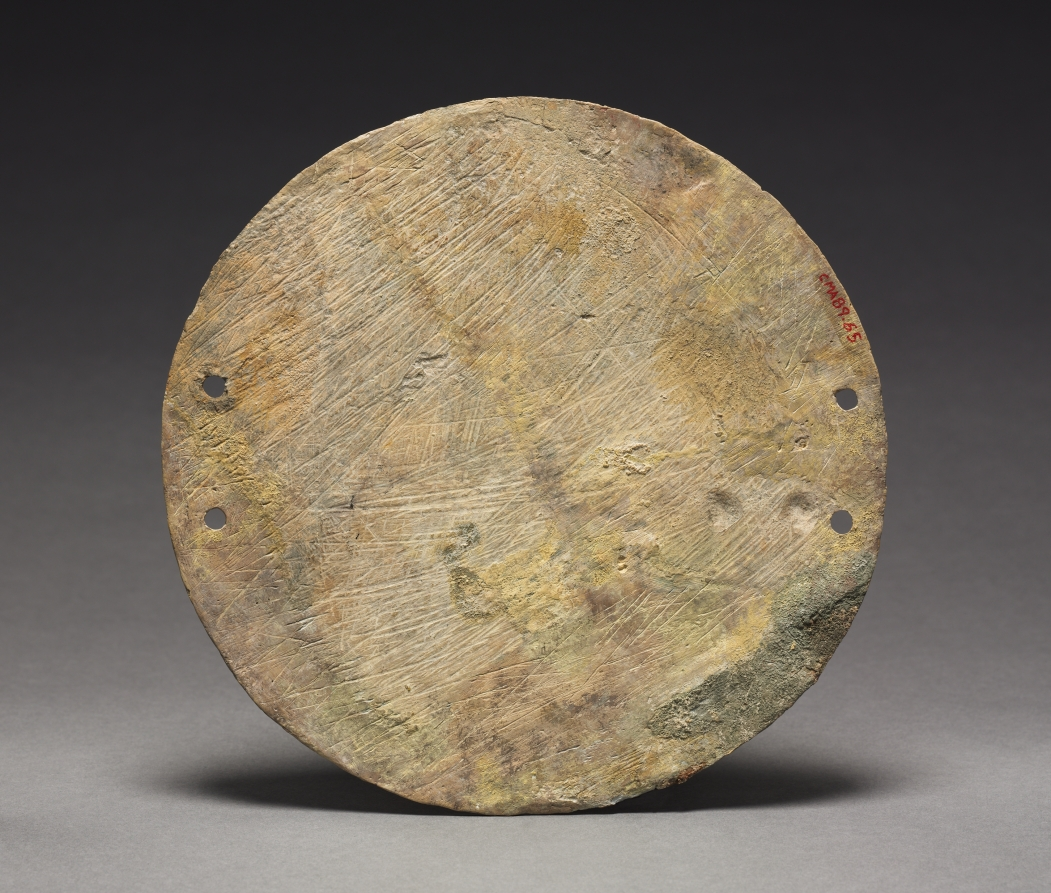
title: Mirror Back with Great Goddess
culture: Guatemala(?), Escuintla, Teotihuacán style, Classic Period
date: 400–550 CE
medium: slate, pigment; other side originally inlaid with polished pyrite mirror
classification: Sculpture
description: An important female deity commands the watery scene on the back of this mirror. The face, bordered by ear ornaments and partially hidden by a nose ornament, appears beneath a huge headdress with the fringed eyes and curled proboscis of an abstract butterfly. The deity rests on a shell-studded water band and two adoring humans offer flowers or incense in a bag. Mirrors served as costume ornaments and perhaps were used in rituals to divine the unknown.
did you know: This ancient Teotihuacan mirror may have been used in divination rituals.